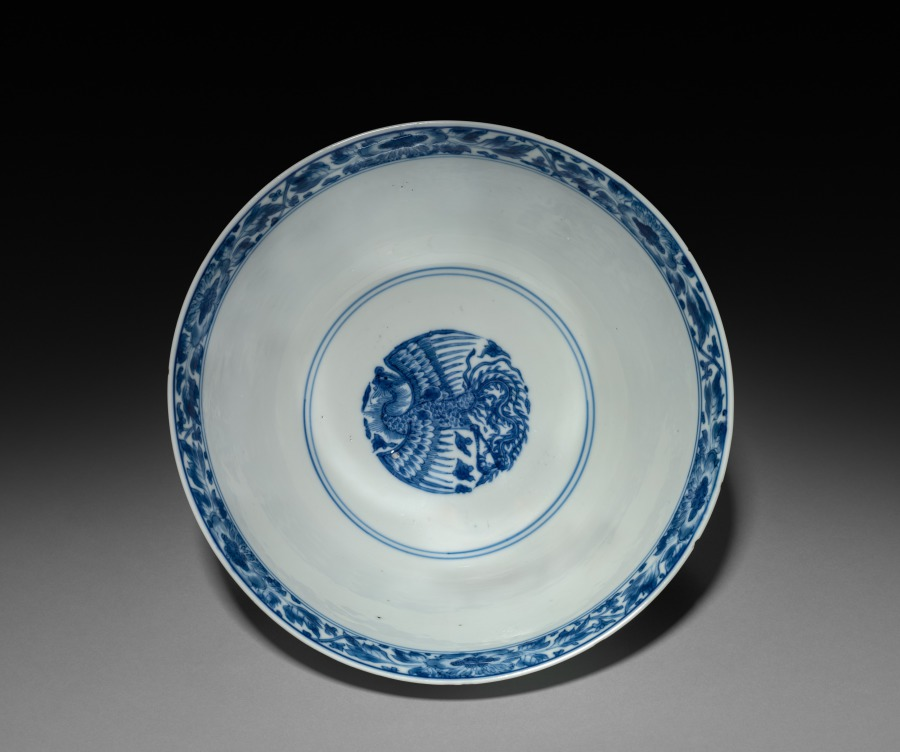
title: Bowl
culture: China, Qing dynasty (1644-1911), Kangxi reign (1661-1722)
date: 1662–1722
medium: porcelain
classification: Ceramic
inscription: 大明嘉靖年製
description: The apocryphal inscription in a double circle on the base reads "made in the Ming dynasty, Jiajing period," but the bowl was made during the reign of the Qing emperor Kangxi.